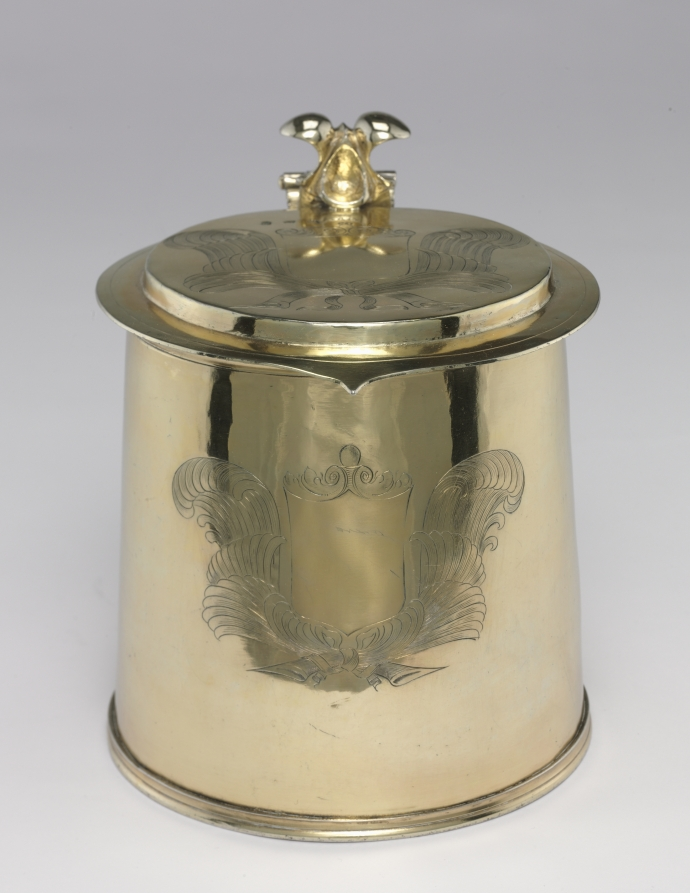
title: Tankard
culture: England, London, 17th century (Charles II)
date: 1665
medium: silver gilt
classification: Silver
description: Silver fulfilled a prominent role in projecting wealth, status, power, and ritual in British life during the 1600s and 1700s. Elaborate forms such as two-handled cups, trophies, trays, and centerpieces not only represented wealth in their sheer silver weight but also provided royal and aristocratic owners a surface for displaying engraved coats of arms, projecting identity and social status. Less wealthy individuals made do with more functional items such as this tankard. The empty cartouches on the drinking vessel suggest that it was produced without a specific patron in mind and that a coat of arms was intended to be added at a later time.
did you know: Tankards, with their characteristic hinged covers, scroll handles, and lobed thumbpieces, were used to drink beer or ale.